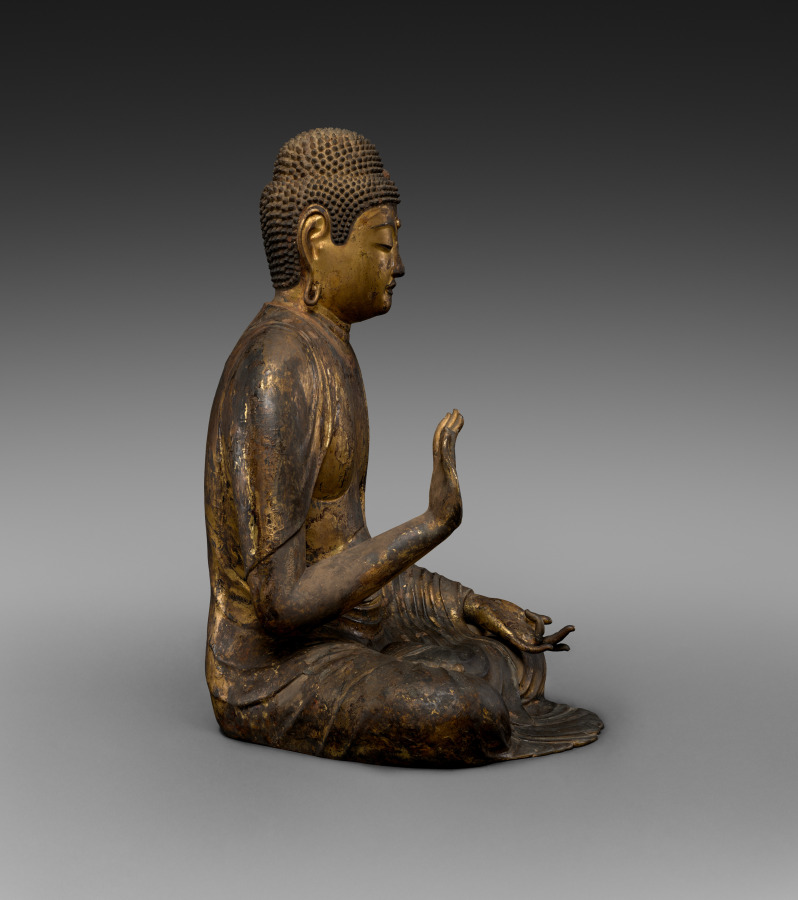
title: Seated Buddha (sculpture)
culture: Japan, Heian period (794–1185)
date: 1100s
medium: gilded wood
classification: Sculpture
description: Composed of a number of hollowed-out pieces of wood that were then covered with lacquer and gilding, this sculpture served as an image of worship in one of the small temples surrounding Kōfukuji, a major Buddhist temple in Nara, Japan. Like many Buddhas, this figure has its right hand positioned in a gesture meaning "fear not." The left hand is a replacement, so its original gesture, a clue to this Buddha's identity, is unknown. However, as the left foot is exposed over the garment, in lotus position, it may have been created as a Medicine Master Buddha, Yakushi Nyorai in Japanese, or the Buddha of our era, Shakyamuni.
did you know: This Buddha is sculpted in the Jōchō style, associated with the sculptor of the Amida at Byōdō'in in Uji.